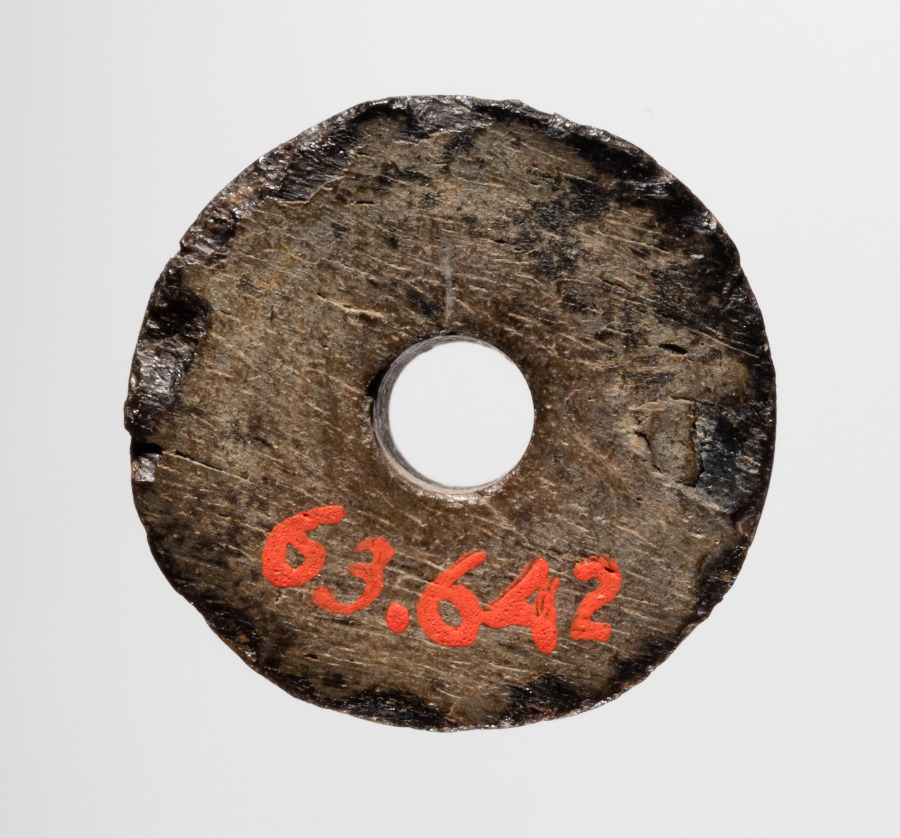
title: Spindle Whorl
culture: Iran, early Islamic period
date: 700s - 900s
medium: bone, incised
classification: Spindle Whorl